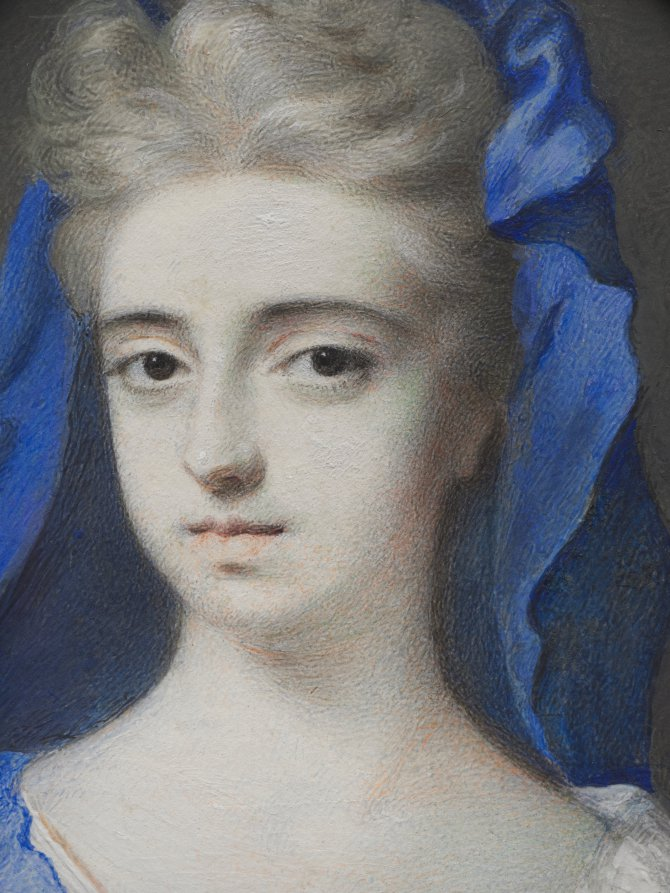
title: Portrait of a Woman in Blue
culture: England, early 18th Century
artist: Peter Cross (British, c. 1645–1724)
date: c. 1700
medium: watercolor on vellum in original ivory frame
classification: Portrait Miniature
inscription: signed right: PC [monogram]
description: Living in London, the youngest of seven children, Peter Cross was probably apprenticed to a limner following the death of his wealthy father. His first miniatures date from around 1661, and he remained active until his death, ushering the medium into the eighteenth century; the greatest British miniaturists working during his lifetime, all had died or ceased to work by 1700. Although ivory had been adopted as a support for British miniature painting a decade before his death, Cross exclusively used the older medium of vellum adhered to card. The artist was also an avid collector, assembling an impressive group of miniatures that included at least twelve works by his neighbor Samuel Cooper. This collection was sold in 1722 at Cross’s house in Covent Garden. Cross’s style is distinguished by a fi ne stippling of colors that combine to create soft, voluminous hair and pale flesh tones. His later works tend to leave the prepared white ground of the vellum bare—coincidentally, a strategy that was adopted by artists painting miniatures on ivory to exploit the support’s translucence. The details of his early instruction are still obscure, but some scholars have postulated that Cooper trained Cross, whereas others note a greater resemblance to the style of Hoskins, and still others detect a similarity to French stippling and suggest that he may have been trained overseas. The artist depicted the unknown sitter almost full face before a plain gray background with her head turned slightly to the right. She dons a white gown trimmed with ruffles at the neckline and a bright blue mantle over her right shoulder. Her powdered hair is swept up and loosely covered either by the blue mantle or a scarf of the same color.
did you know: This miniature is in its original ivory frame, stained a mottled brown to imitate tortoise shell.